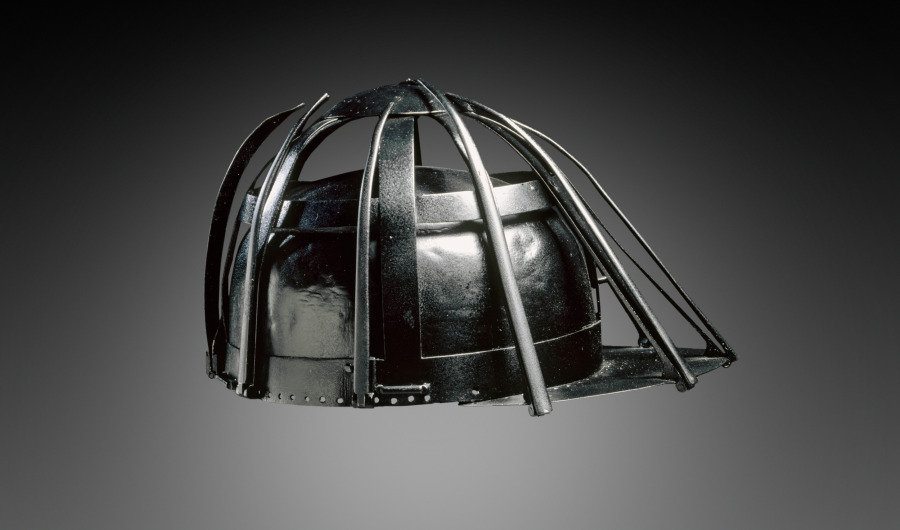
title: Cavalry Spider Helmet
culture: France, 17th century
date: 1600s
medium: iron with black paint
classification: Arms and Armor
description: The "spider-like" legs of this helmet protected the mounted soldier's face and head from slashing sword blows. The legs could be raised and locked up out of the way when not required.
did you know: This helmet was made specifically for use in the field by the light cavalry who wore only a half suit of armor, sturdy riding boots, and an open helmet.